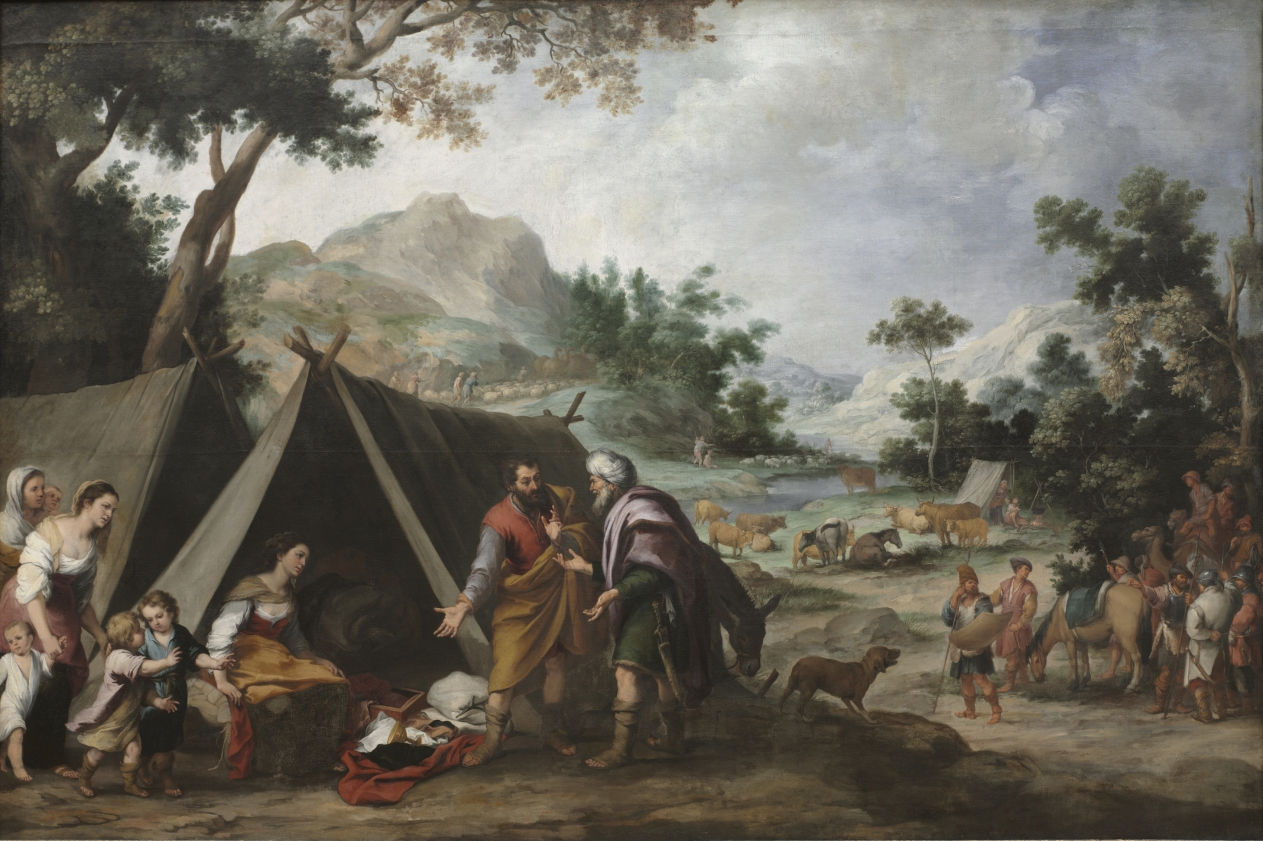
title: Laban Searching for His Stolen Household Gods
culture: Spain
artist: Bartolomé Esteban Murillo (Spanish, 1617–1682)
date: c. 1665–70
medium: oil on canvas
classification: Painting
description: This story comes from the Old Testament book of Genesis and stresses the value of reconciliation. Jacob lived with his uncle Laban for years, marrying Laban’s daughters Rachel and Leah. When the relationship between the men soured, Jacob and his family departed, while Rachel secretly stole her father’s household gods. When Laban discovered that the statues were missing, he pursued Jacob, accusing him of theft. Here, Jacob invites Laban to search his tent, while Rachel sits on the saddlebag containing the statues. After coming up empty-handed, Laban proposes a truce, ending the squabble.